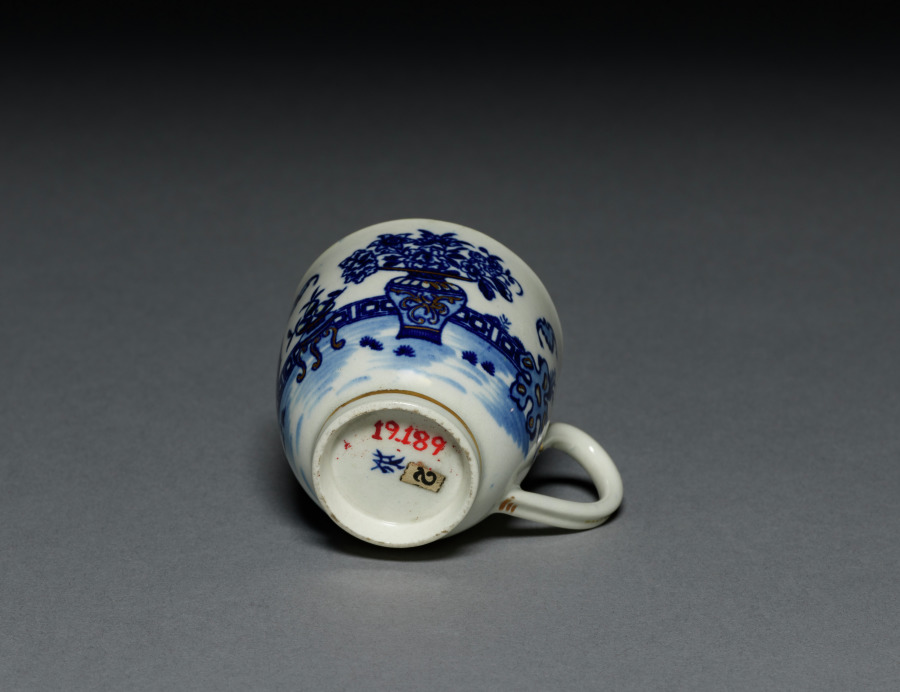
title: Cup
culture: England, 18th century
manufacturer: Worcester Porcelain Factory (British, established 1751)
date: 1760–1780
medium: porcelain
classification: Ceramic